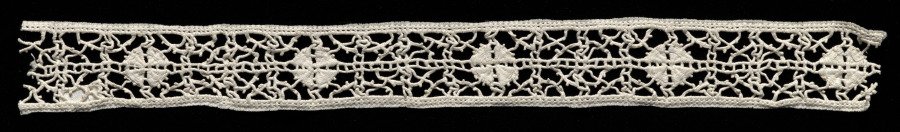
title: Lace Band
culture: Italy, 1800s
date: 1800s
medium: Linen: needle lace (Reticella)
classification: Lace